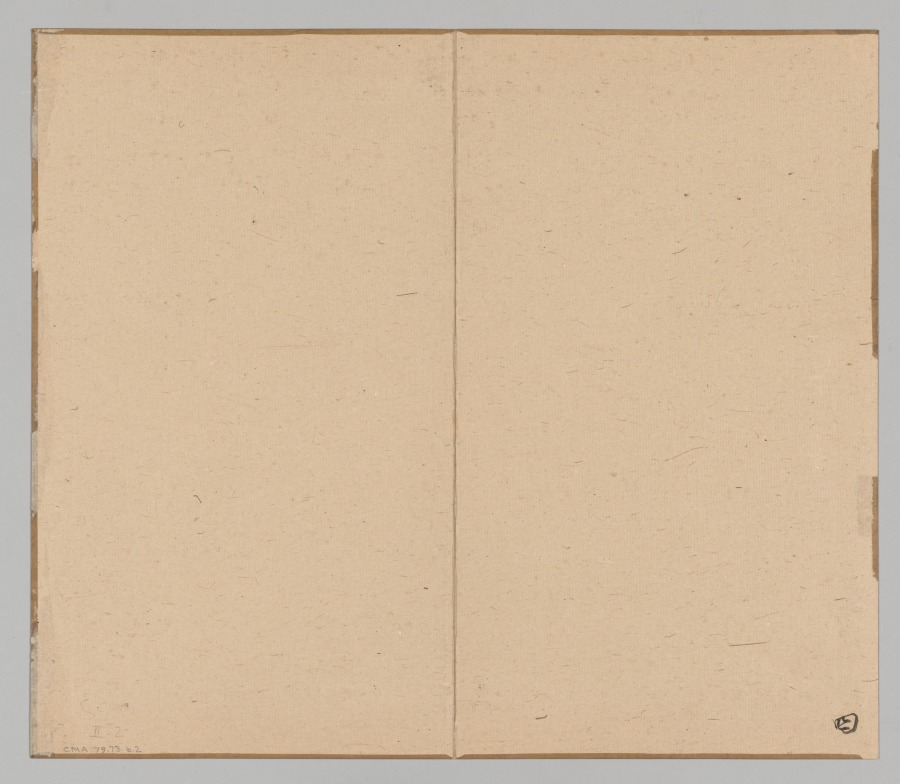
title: Reverberations of Taiga, Volume 2 (leaf 2)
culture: Japan, Edo period (1615–1868)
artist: Aoki Shukuya (Japanese, d. 1802)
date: mid- to late 1700s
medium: double-leaf from a pair of albums; ink and light color on paper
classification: Portfolio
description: Traditionally, young painters in Japan began their studies with an established master-painter. The master's compositions invariably became models that the apprentice copied to learn various ink and brush techniques. Shukuya was a pupil of the famous Kyoto artist Ikeno Taiga, whose style is reflected in these sketches of rocks, trees, and mountains.